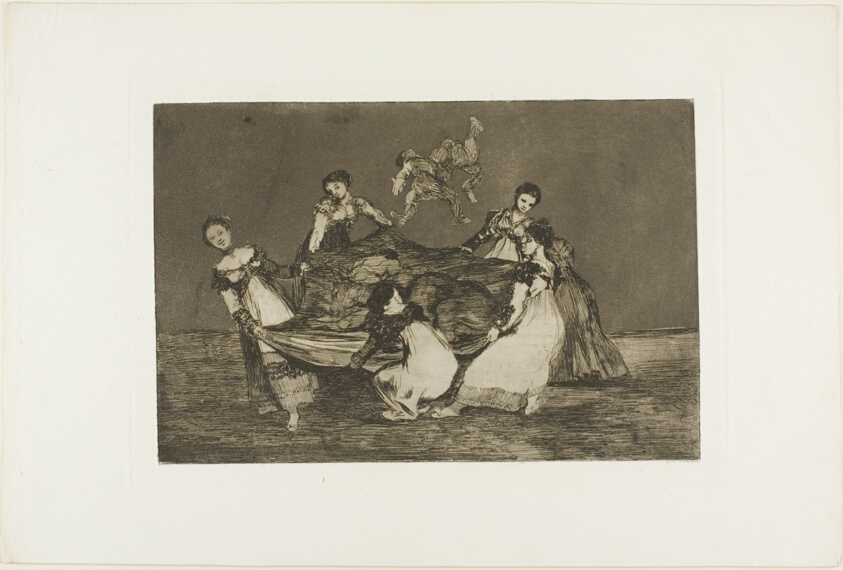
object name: Print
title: Heavier than a dead donkey, plate one from Los Proverbios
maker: Francisco José de Goya y Lucientes (Spanish, 1746-1828)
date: 1815/24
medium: Etching and aquatint on ivory wove paper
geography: Spain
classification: etching; print; prints and drawing